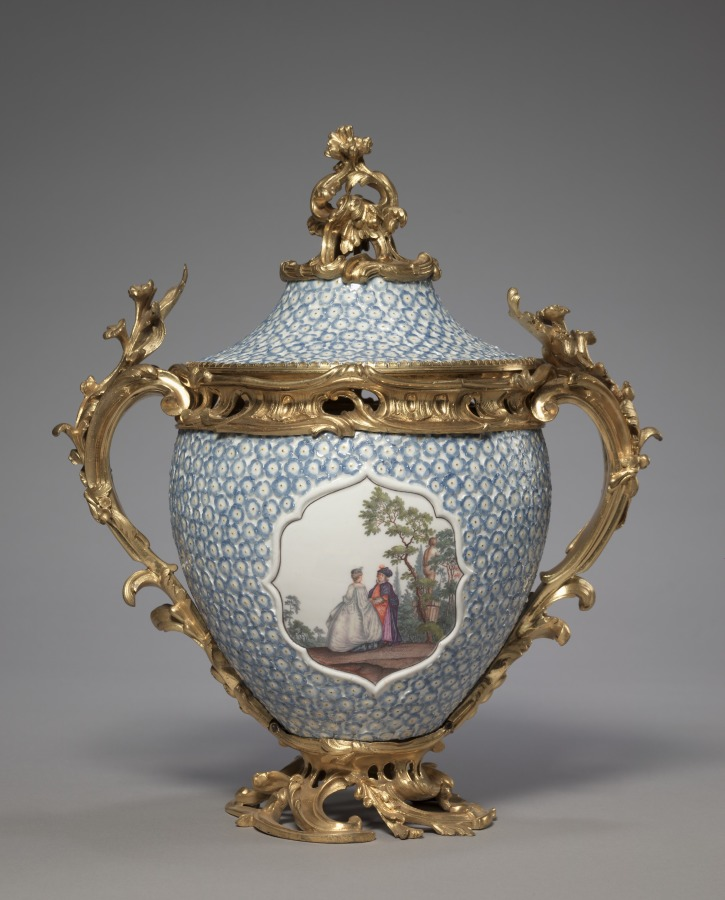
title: Covered Vase (1 of 2)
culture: Germany, 18th century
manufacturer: Meissen Porcelain Factory (German, est. c. 1710)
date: 1749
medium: porcelain mounted in gilt bronze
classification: Ceramic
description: One of these vases is dated 1749. They were perhaps part of a set of four covered vases that we know from documents were acquired by Mme. de Pompadour, mistress of Louis XV in 1752.